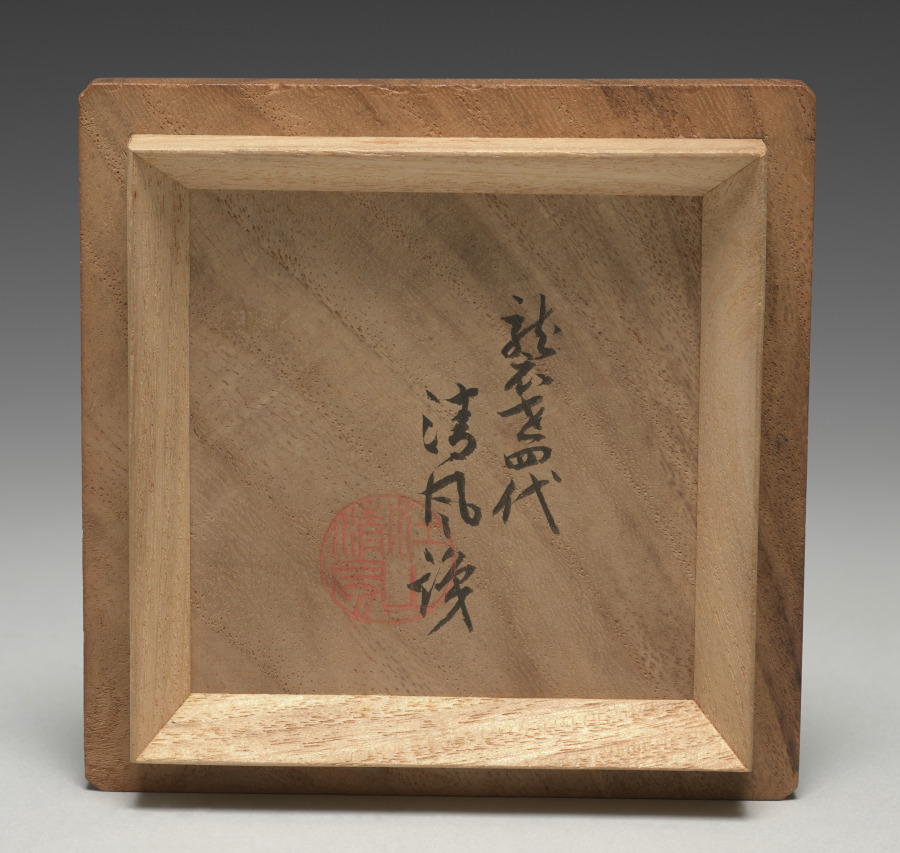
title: Vase with Dragon Roundels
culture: Japan, Meiji period (1868–1912)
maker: Seifū Yohei III (Japanese, 1851–1914)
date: 1900–1914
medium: Porcelain with purple glaze and molded and carved design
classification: Ceramic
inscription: 清風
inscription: 成山清風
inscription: The top of the box lid describes the vase.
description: Each side of this lavender-colored vase is nearly covered with a low-relief design of a four-clawed dragon curled around a flaming jewel. The box lid carries an attestation by Yohei IV that the vase was produced by his predecessor, and the signature on the base is one Yohei III used later in his career. The lid also makes reference to Jun (J. Kin) ware, which was made in numerous kilns in what is now Yuzhou or Yuxian in Henan Province, China, during the Northern Song dynasty. Some Jun wares had an opalescent purple glaze, which was clearly the inspiration for the color seen on this vase.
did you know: Kyoto-based Japanese ceramist Seifū Yohei III (1851–1914) admired the glaze colors found on Chinese porcelain and tried to replicate them through intensive experimentation.